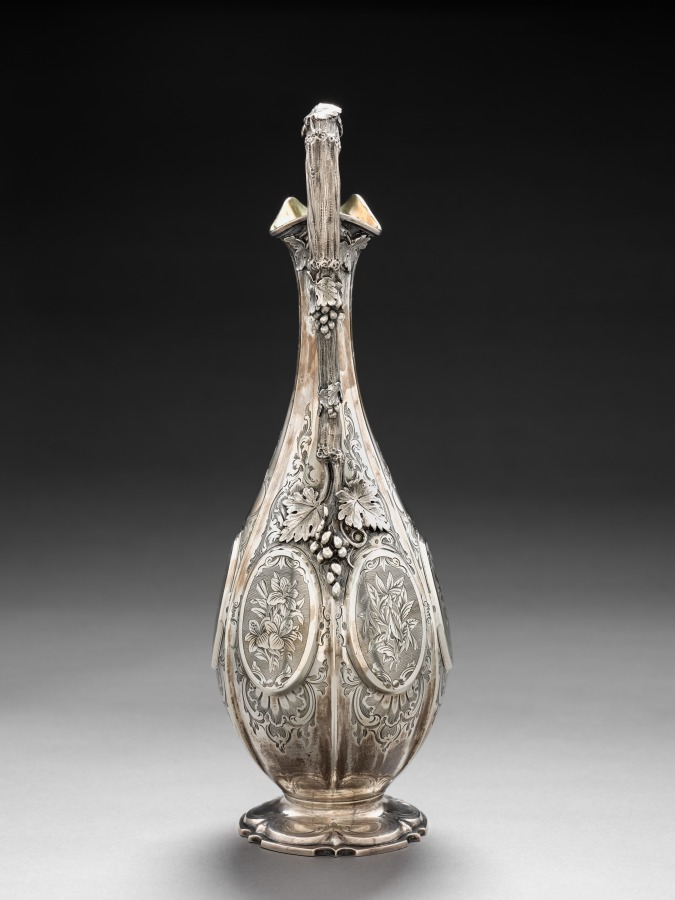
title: Pitcher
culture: England, 19th century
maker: Edward Barnard & Sons (British, c. 1680–2003)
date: c. 1870–80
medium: silver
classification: Silver